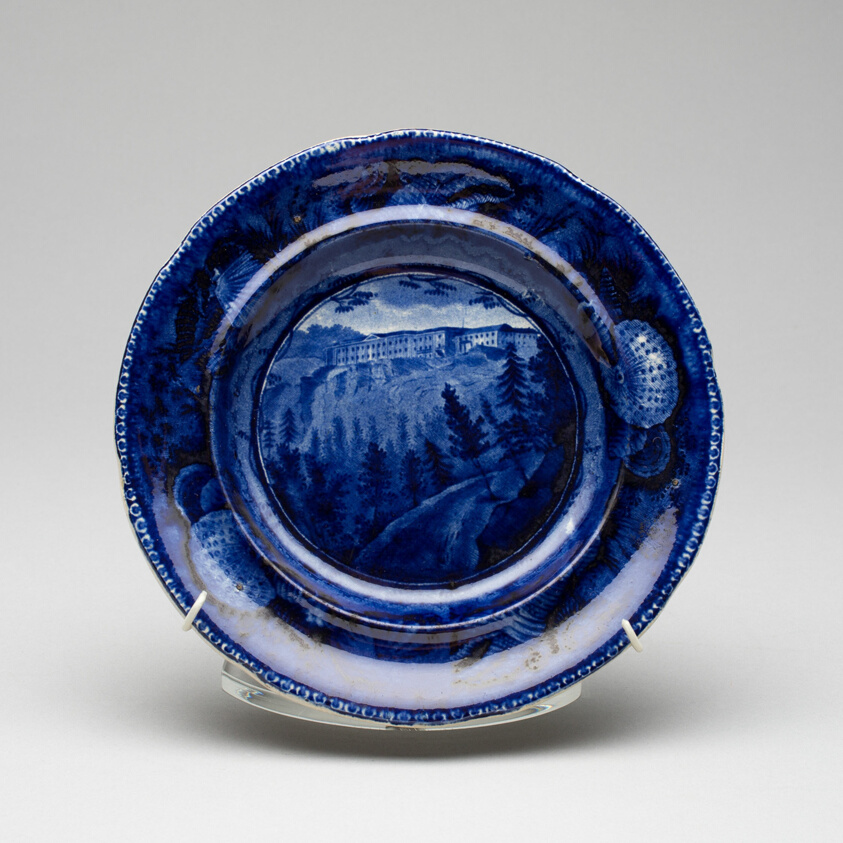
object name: Decorative Arts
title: Plate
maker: English for the American market; Staffordshire, England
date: c. 1825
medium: Earthenware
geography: Staffordshire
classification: earthenware; american decorative arts; ceramics; decorative arts